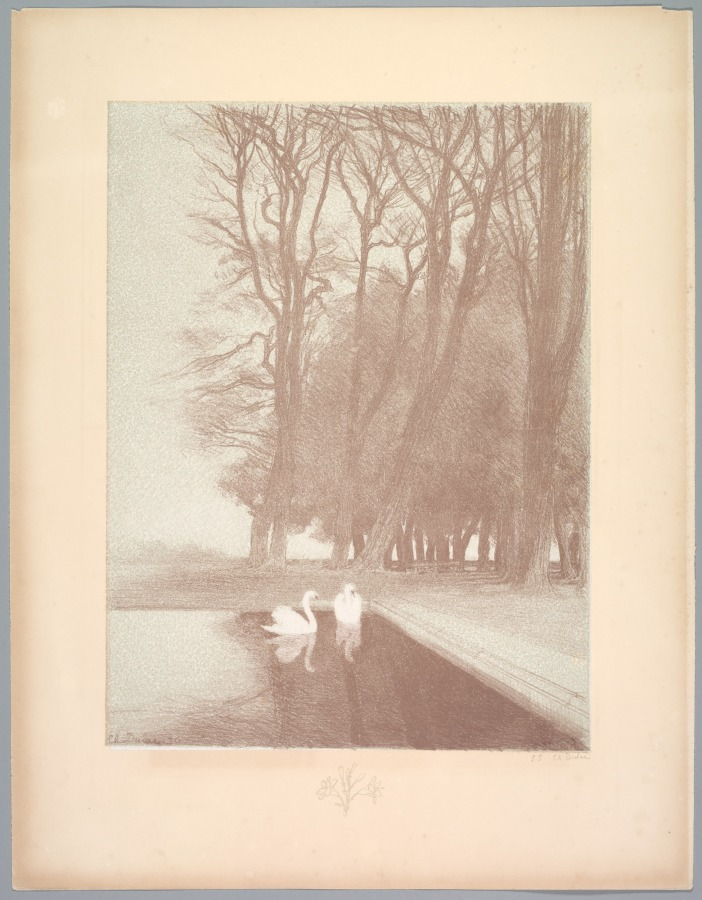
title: Suite de Paysages: Landscape, Plate 6, Remarque, Lilies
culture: France, 19th century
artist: Charles Marie Dulac (French, 1865–1898)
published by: Printer: Lemercier, Imprimeur Lemercier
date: 1892–93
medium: color lithograph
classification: Print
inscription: Below image, right, in graphite: 55 Ch Dulac In plate, left corner: Ch. Dulac t6